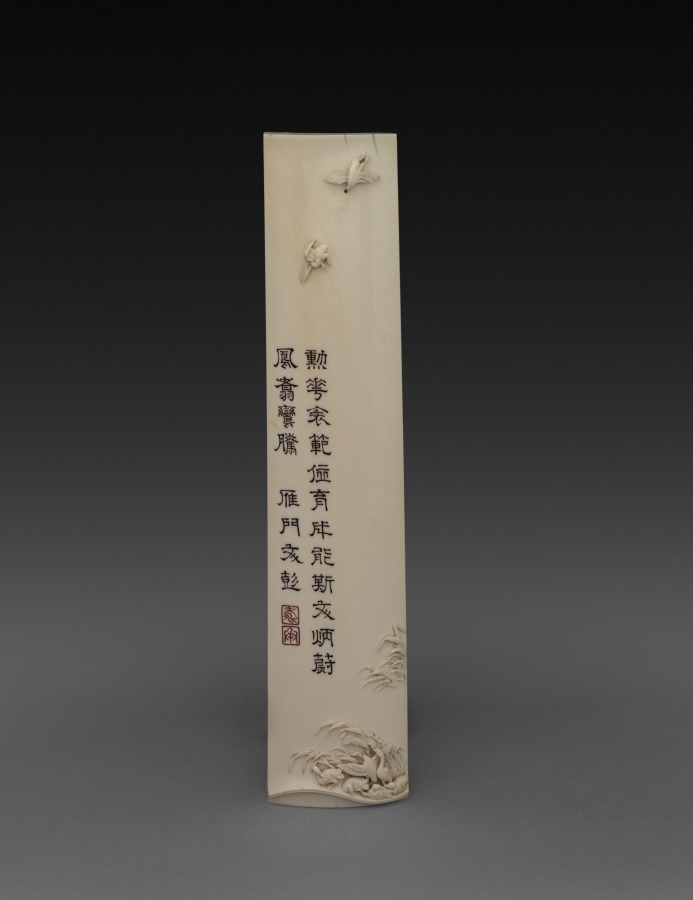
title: Wrist-Rest with Crayfish and Water Plants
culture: China, Qing dynasty (1644-1911)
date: 1700s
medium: ivory and polychrome pigment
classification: Ivory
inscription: Inside: Seal of Hsiang Yuan-pien; Reverse: Engraved poem by Wen P'eng (1498-1573)